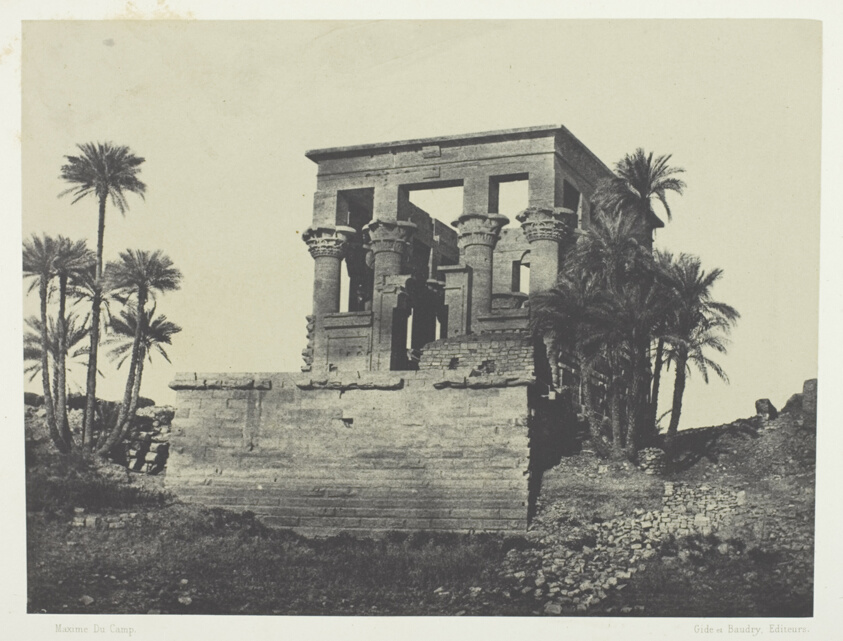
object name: Photograph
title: Temple Hypêthre, Philoe; Nubie, plate 70 from the album "Egypte, Nubie, Palestine et Syrie" (1852)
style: 19th century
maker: Maxime Du Camp (French, 1822–1894)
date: 1849/51, printed 1852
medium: Salted paper print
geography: France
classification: salted paper print; photographic process; photography; photograph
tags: Collected by Hugh Edwards, Egypte, Nubie, Palestine et Syrie